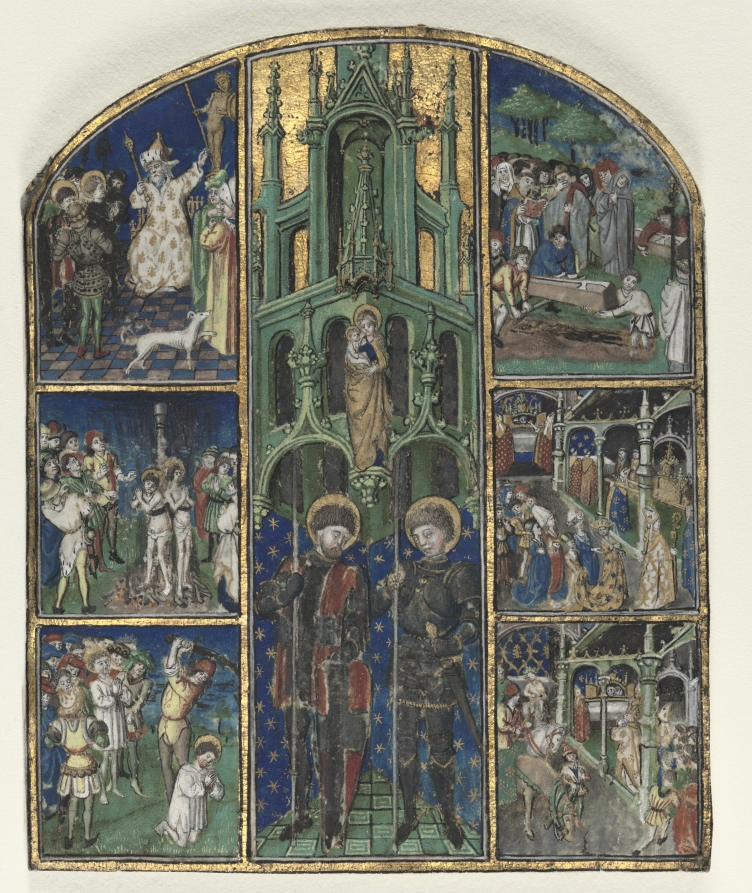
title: Leaf from the Hours of Duke Louis of Savoy: Saints Nereus and Achilleus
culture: France, Savoy(?), 15th century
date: mid-1400s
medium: tempera and gold on vellum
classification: Manuscript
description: Once part of a book of hours made for Louis, Duke of Savoy and Prince of Piedmont (1413–1465), this miniature depicts two Roman martyrs of the early church, Nereus and Achilleus, shown in the center. Their feast day was jointly honored on May 12, suggesting this leaf comes from the Suffrages, a customizable section of a book of hours containing prayers to particular saints. On the left we see the saints being asked to worship idols, which they refuse. They are then burned at the stake and beheaded. On the right we see their burial at the top and the transfer of their relics to a new location below. Some sections this book are currently preserved in the Bibliothèque Nationale in Paris.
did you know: An estimated 82 folios is still missing from the original manuscript, the bulk of which is preserved in Paris.